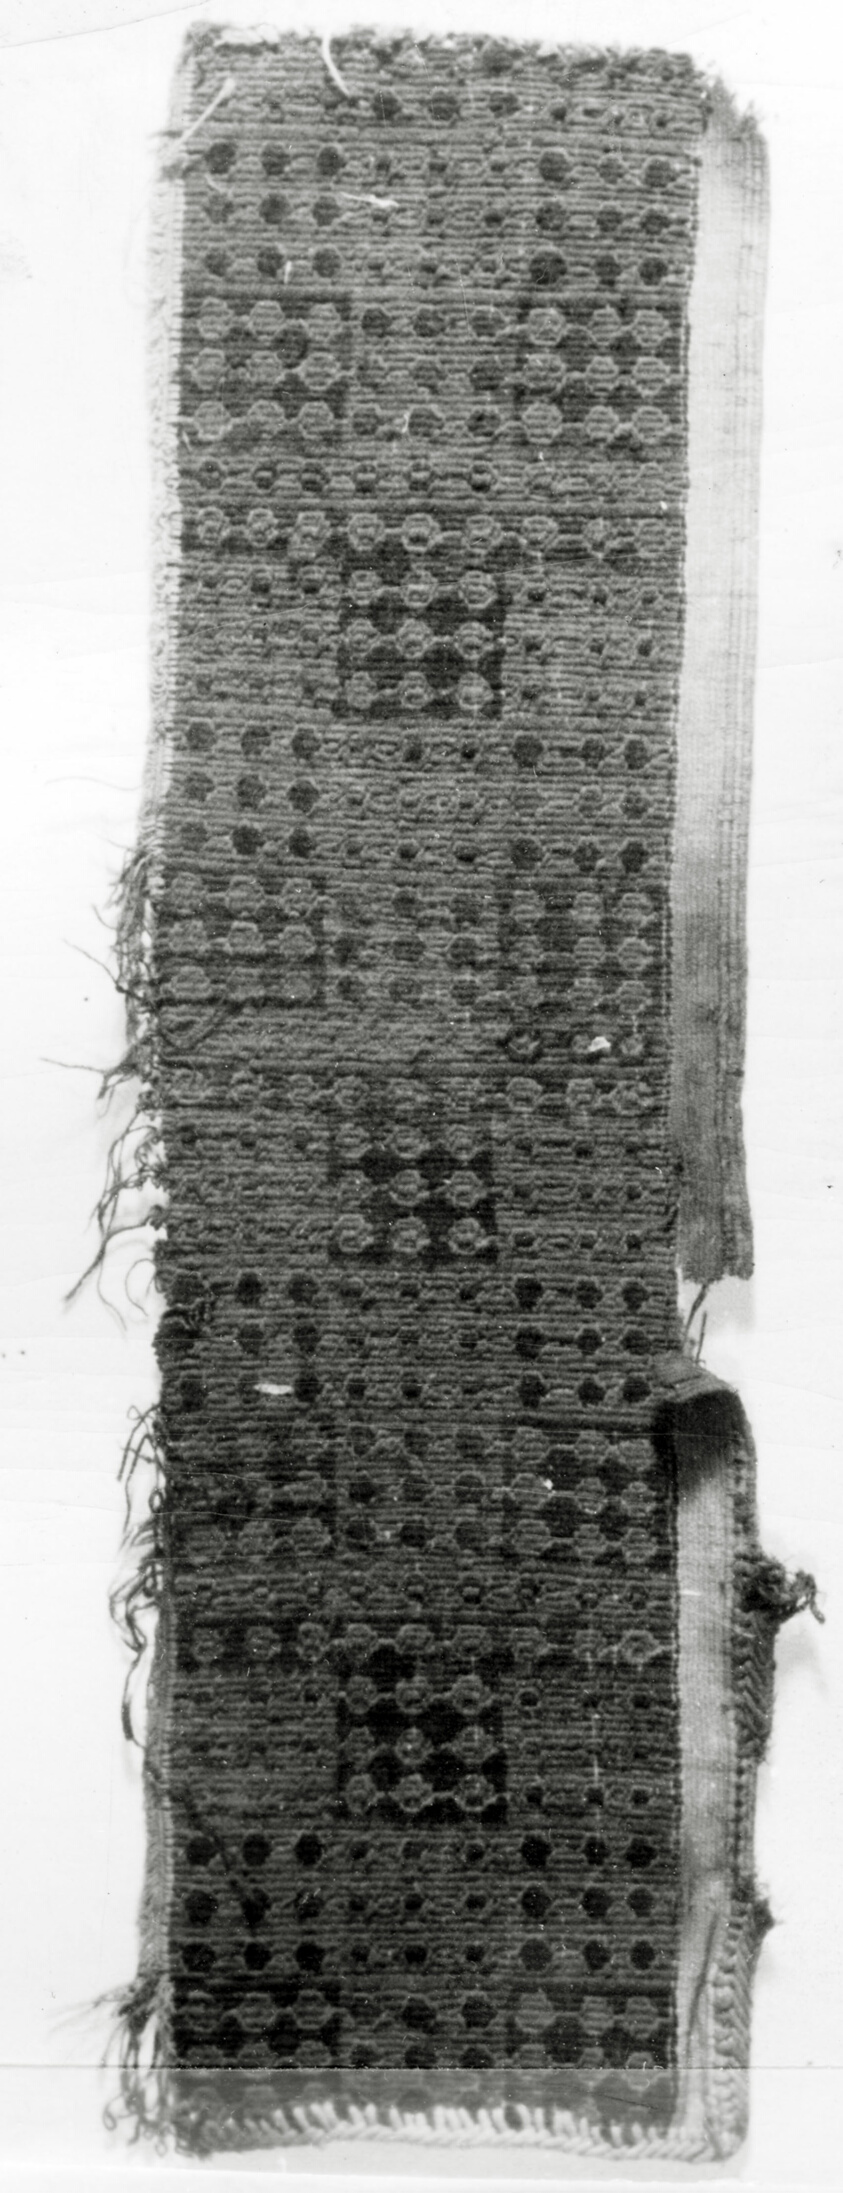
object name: Textile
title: Fragment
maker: Probably central coast, Peru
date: A.D. 1000/1476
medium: Compound weave; All-over design in blue, green, red and yellow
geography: Peru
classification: textile; weaving